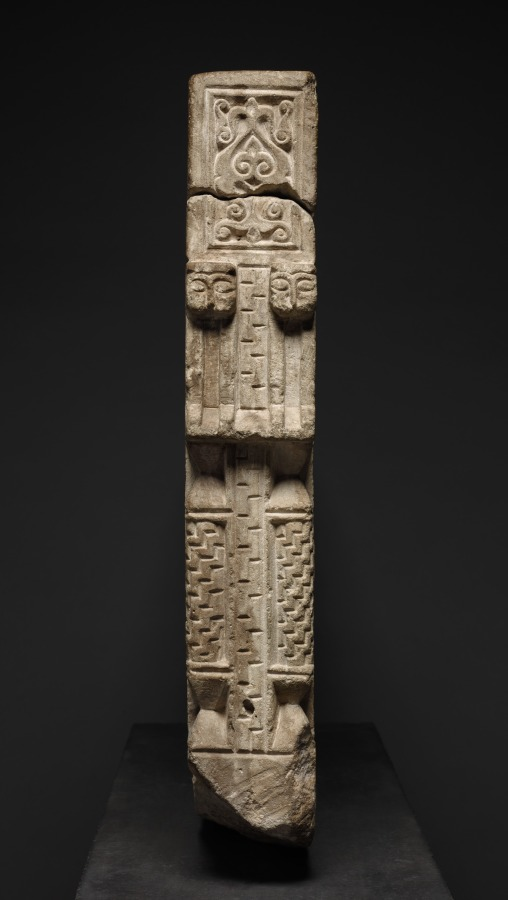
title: Balustrade Fragment with Animals from the residence of Hajji Hasan ibn Ibrahim ibn Muhammad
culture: Iran, Hamadan, Ilkhanid period (1256–1353)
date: 1303–4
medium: limestone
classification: Sculpture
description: This architectural relief shows a lion attacking a bull surrounded by other predators pursuing their prey, with scrolling vegetal motifs filling the spaces between. Scenes of powerful predators in the act of hunting and capturing other animals echo the royal imagery of pre-Islamic Iran. This piece was part of a balustrade in a private home; the owner and construction date are known from another fragment from the same building. The building was embellished when the Mongols controlled Iran, and the relief shows a continuity in style from carvings made during the preceding Turkic Seljuk period (1037–1194). Under Turkic and Mongol rule in Iran, Islamic injunctions against making figural imagery were loosened.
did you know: This balustrade and two others, now in the Metropolitan Museum of Art in New York and the Louvre in Paris, are from a building probably in the city of Hamadan, Iran.